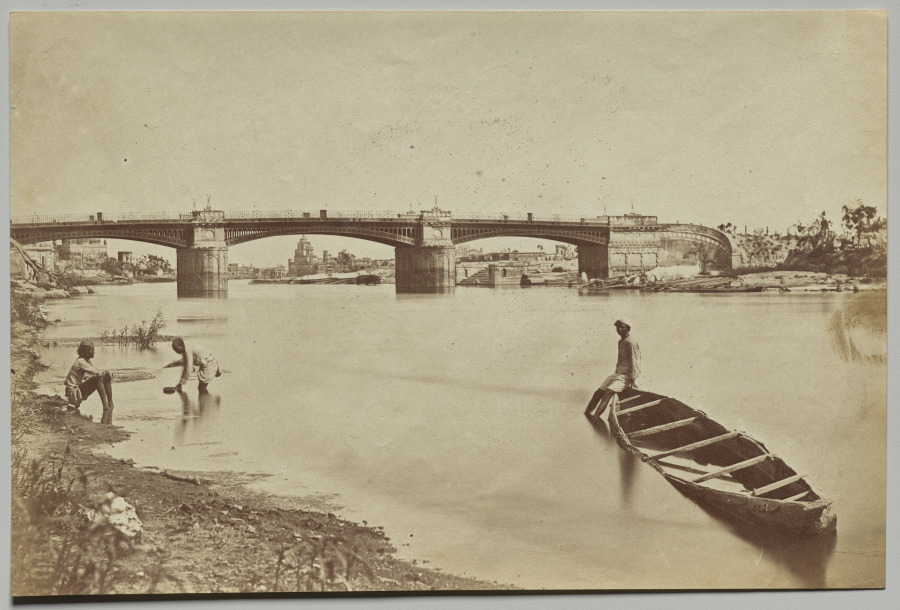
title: The Iron Bridge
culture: England, 19th century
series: Lucknow After the Siege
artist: Felice A. Beato (British, 1832–1909)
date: 1858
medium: albumen print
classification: Photograph